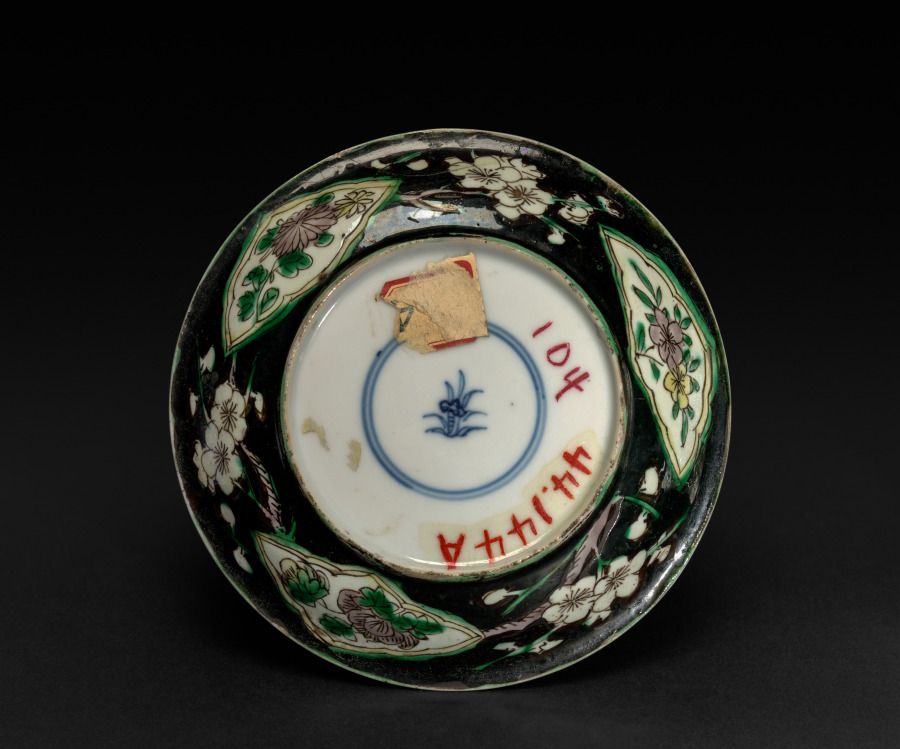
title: Saucer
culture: China, Qing dynasty (1644-1911), Kangxi reign (1662-1722)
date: 1662–1722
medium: porcelain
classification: Ceramic